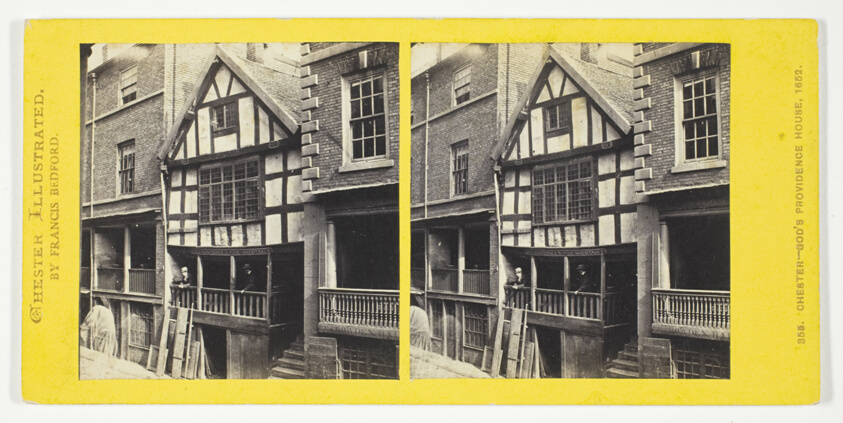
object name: Photograph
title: Chester - God's Providence House, 1652, No. 355 from the series "Chester Illustrated"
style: 19th century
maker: Francis Bedford (English, 1816-1894)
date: 1850/94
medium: Albumen print, stereo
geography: England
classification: photography; photograph; albumen silver print; stereograph (albumen)